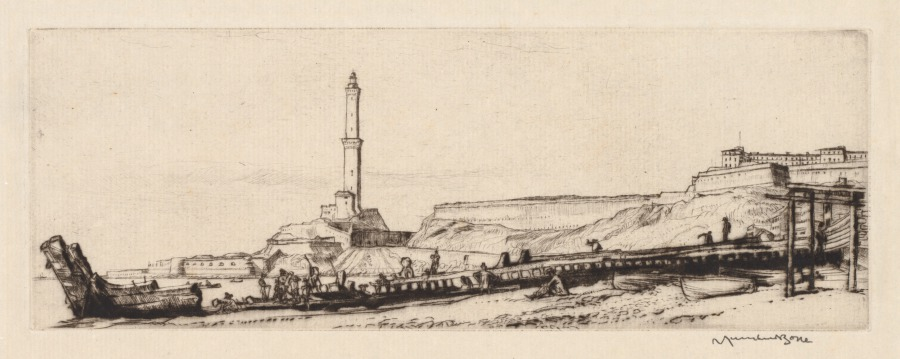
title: The Langterna, Genoa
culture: Britain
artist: Muirhead Bone (British, 1876–1953)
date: 1912–16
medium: drypoint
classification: Print